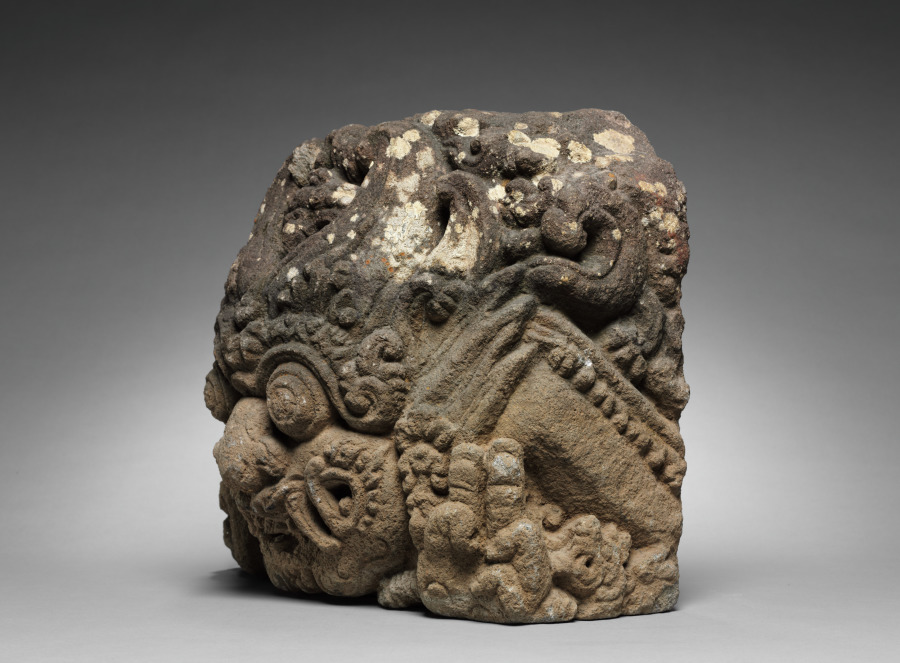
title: Architectural Sculpture: Face of Time (Kala-mukha)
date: 1100s–1300s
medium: volcanic stone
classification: Sculpture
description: The bulging eyes and curved fangs of Kala emphasize the ferocity of the figure who stands for Time and Death, the devourer of all creation. Placed above the entry to an Indonesian temple, Kala serves both to protect the site and indicate a symbolic rebirth for those who pass beneath to enter the sacred space. Though related to the faces of glory on monuments in India, Kala and the volcanic stone from which it has been carved are distinctively Javanese.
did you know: The fiercest looking Kala masks are from eastern Java, made between the 10th to 15th century.